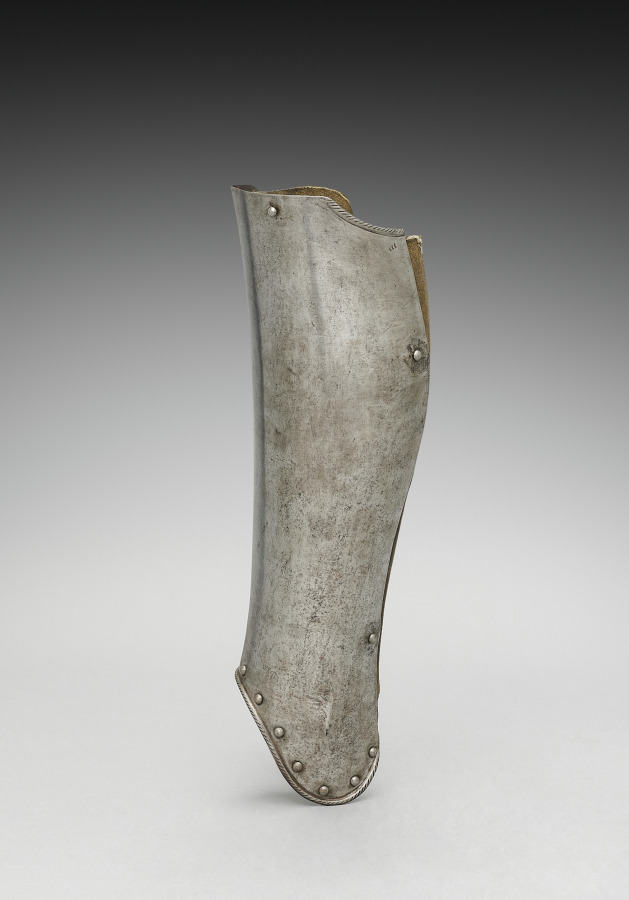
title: Left Greave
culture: Germany, 19th century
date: 1801–1900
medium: steel with black paint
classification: Arms and Armor